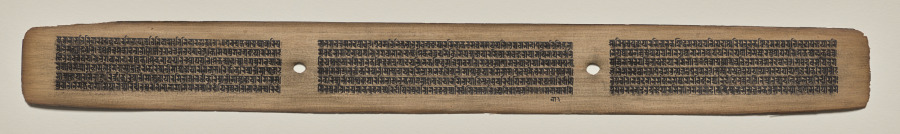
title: Text, Folio 62 (recto), from a Manuscript of the Perfection of Wisdom in Eight Thousand Lines (Ashtasahasrika Prajnaparamita-sutra)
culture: Eastern India, Bihar, Vikramashila Monastery. Painting: Nepal, Kathmandu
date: Sunday, September 14, 1119 (year 239 of the Newar Samvat in the month of Ashvina)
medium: gum tempera and ink on palm leaves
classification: Painting